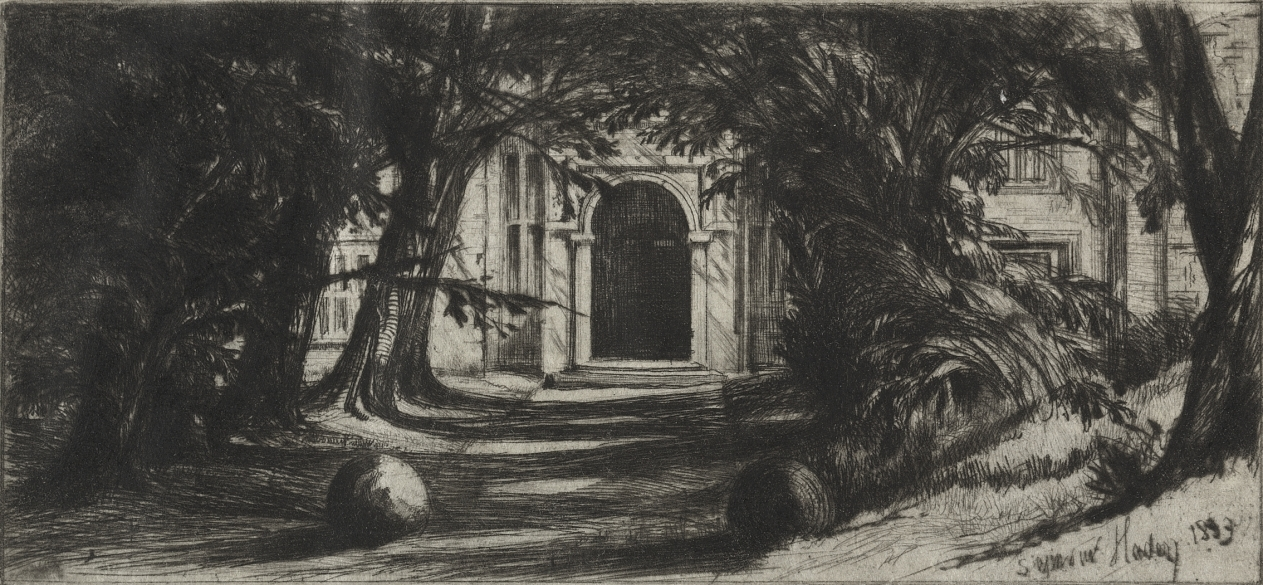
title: Mytton Hall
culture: England, 19th century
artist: Francis Seymour Haden (British, 1818–1910)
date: 1859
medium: drypoint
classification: Print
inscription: lower right, in graphite: Seymour Haden (faded)